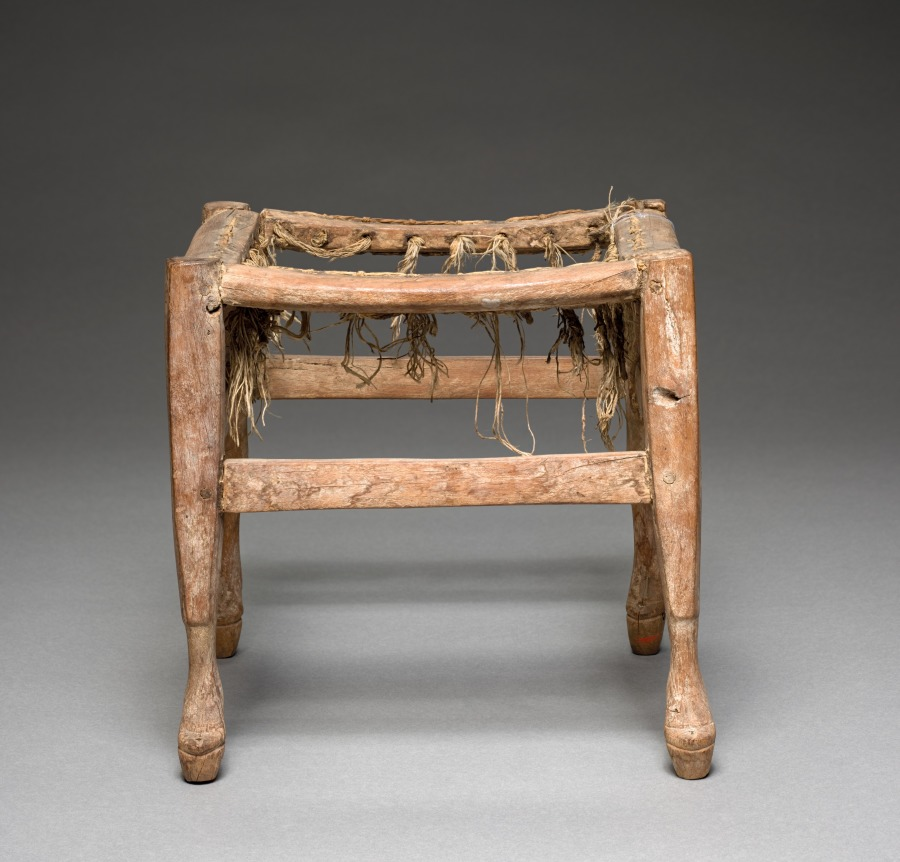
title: Child's Stool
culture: Egypt, New Kingdom (1540–1069 BCE), Dynasty 19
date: 1295–1188 BCE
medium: wood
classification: Funerary Equipment